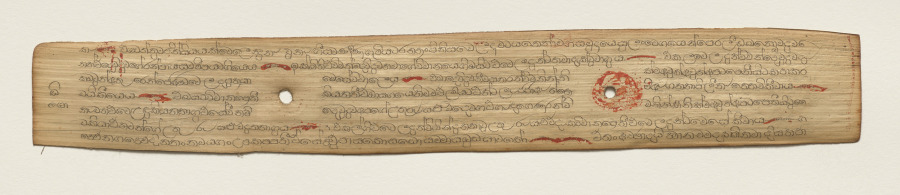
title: Leaf from a Buddhist Manuscript (recto)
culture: Sri Lanka, Singhalese, Late 17th century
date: c. 1700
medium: fiber paper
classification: Manuscript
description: Palm leaf material is still used for manuscripts in Sri Lanka. The palm leaves are prepared first by boiling them, drying them in the sun, and then rubbing them with oils. Scribes then use a metal stylus to incise the text. Then charcoal powder is wiped across the pages, filling in only the inscribed lines.